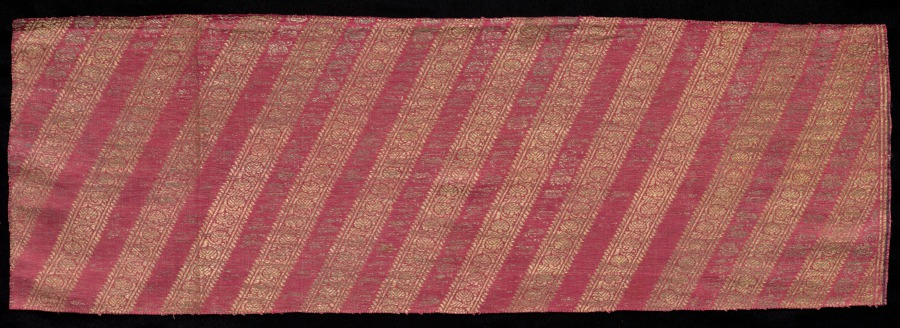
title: Fragment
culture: India, 19th century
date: 1800s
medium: brocade; silk and metal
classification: Textile